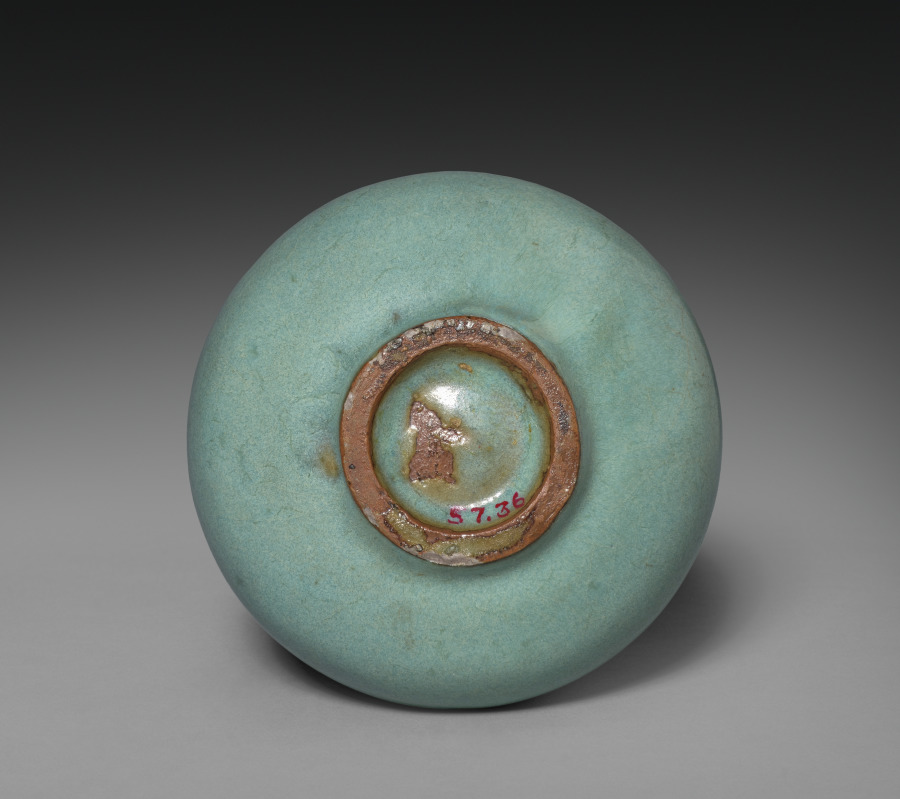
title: Jar with Cover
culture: China, Henan province, Yuxian, Northern Song dynasty (960-1127) or Jin dynasty (1115-1234)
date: 1100s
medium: porcelaneous stoneware with blue glaze and splashes of purple, Jun ware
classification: Ceramic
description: The beauty of Jun ware lies in its spectacular glaze effects, which provide immediate visual appeal. The glaze that is thickly applied onto the heavily potted body also lends the vessel a sense of volume. As shown here, its glaze colors range from soft milky-blue to rose-purple. The purple suffusions are created by splashing or brushing copper-rich pigments onto the glaze before firing. The merging of purple splashes with opalescent blue glaze displays rich tonal variations, resembling purplish glows at sunset.